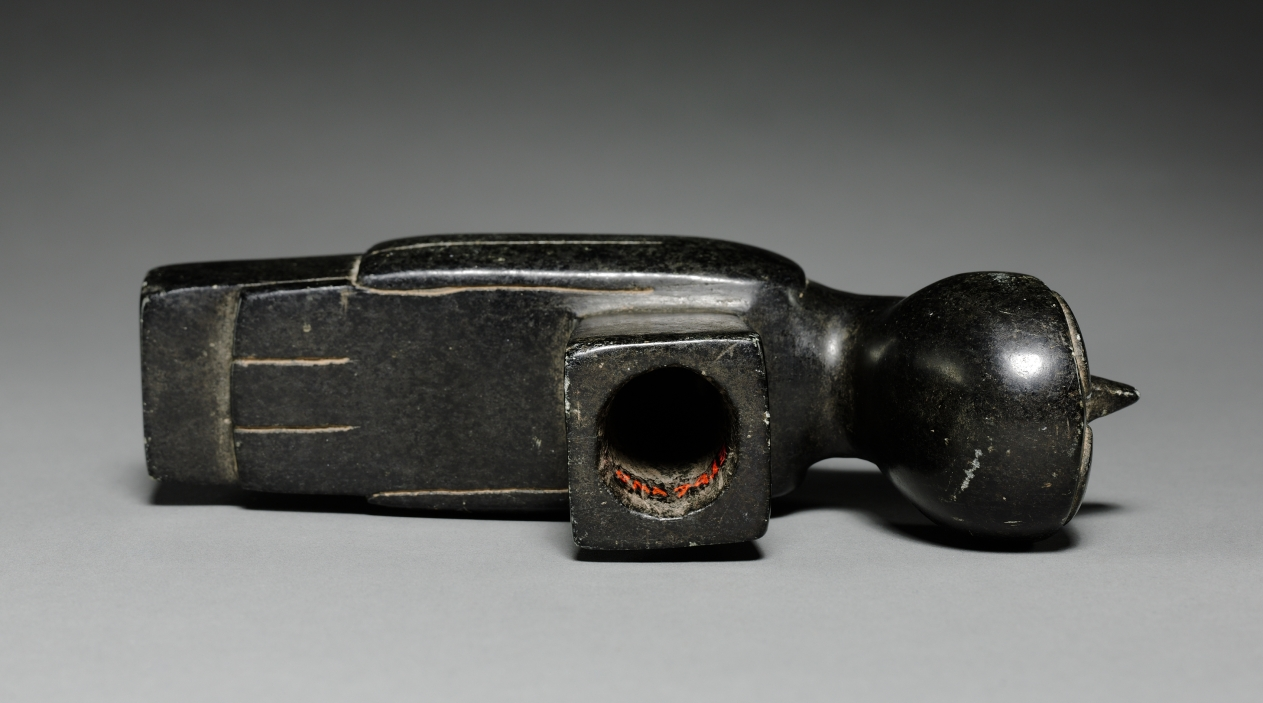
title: Pipe in the Form of an Owl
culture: America, North American Indian, Copena Culture (Tennessee area?)? or modern reproduction, Middle Woodland Period (100-600) or 20th century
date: 100–600 CE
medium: stone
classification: Sculpture